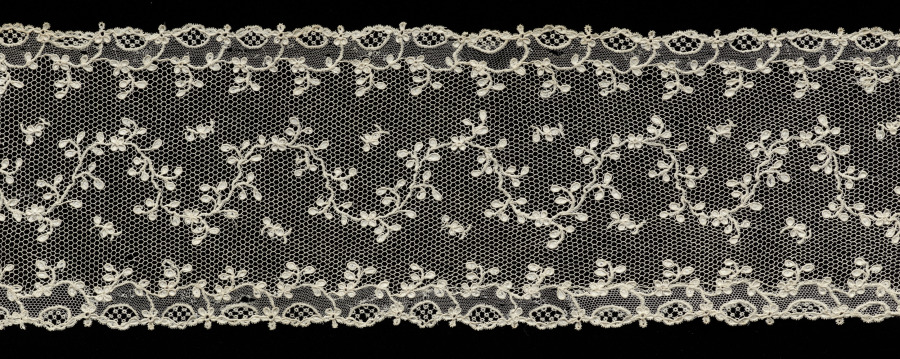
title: Lace Lappet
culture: France, Argentan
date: 1715–74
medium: Linen: needle lace (Point de Argentan)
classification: Lace